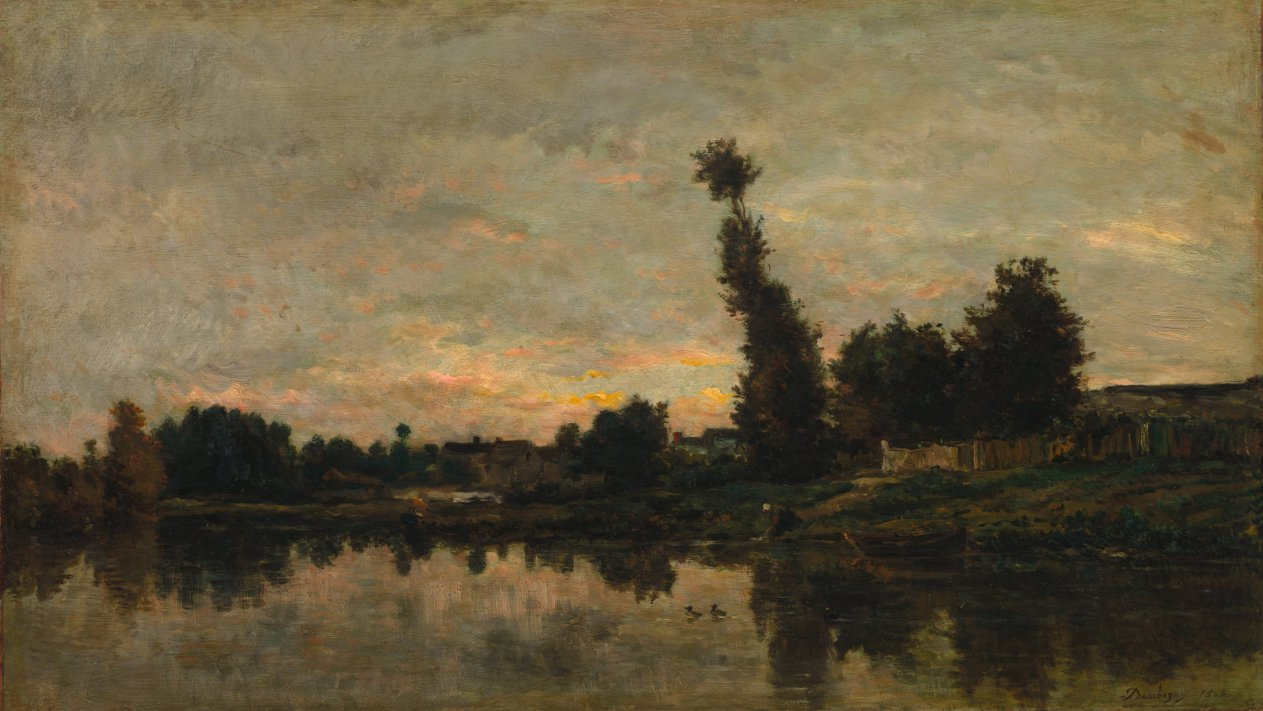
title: Sunset on the River Oise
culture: France, 19th century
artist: Charles François Daubigny (French, 1817–1878)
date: 1866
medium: oil on wood panel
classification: Painting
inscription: Signed in lower right: Daubigny 1866.